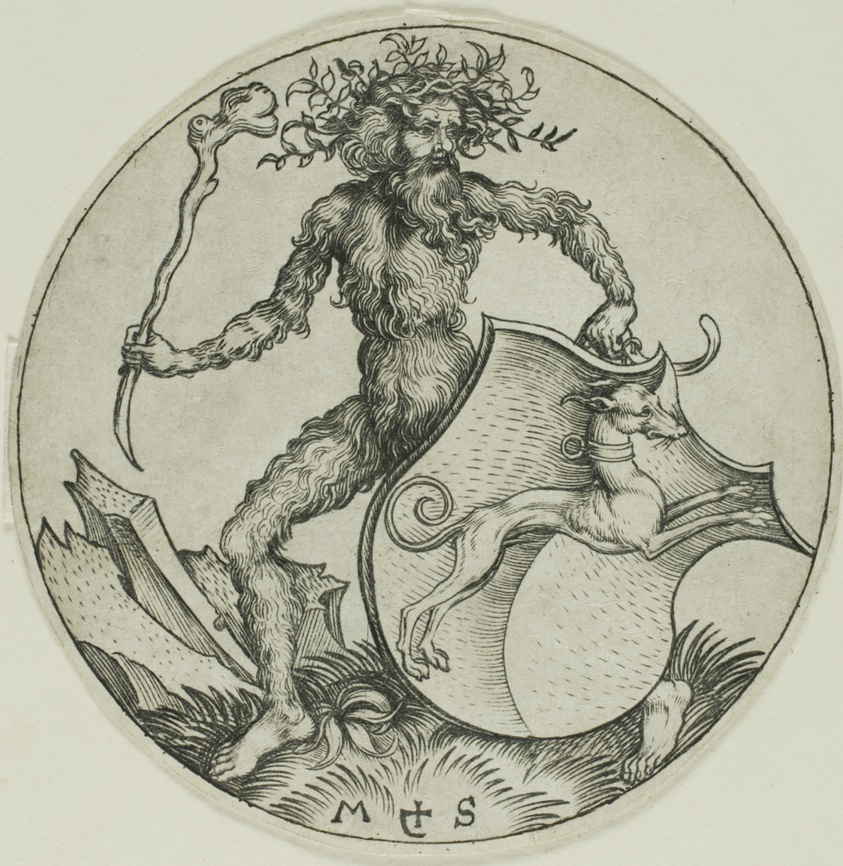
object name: Print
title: Shield with a Greyhound, Held by a Wild Man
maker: Martin Schongauer (German, c. 1430/50-1491)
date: 1469/82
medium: Engraving in black on ivory laid paper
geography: Germany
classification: engraving; print; prints and drawing